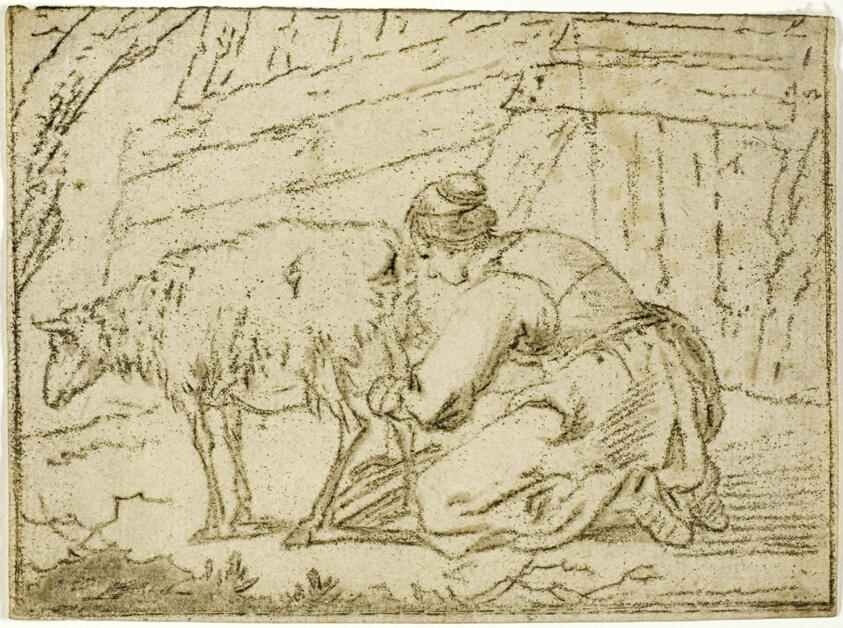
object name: Print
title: Woman Milking an Ewe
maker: Cornelis van Noorde (Dutch, 1731-1795); after Nicolaes Berchem the Elder (Dutch, 1621/22-1683)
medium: Soft ground etching in black on paper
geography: Holland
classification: etching; print; prints and drawing